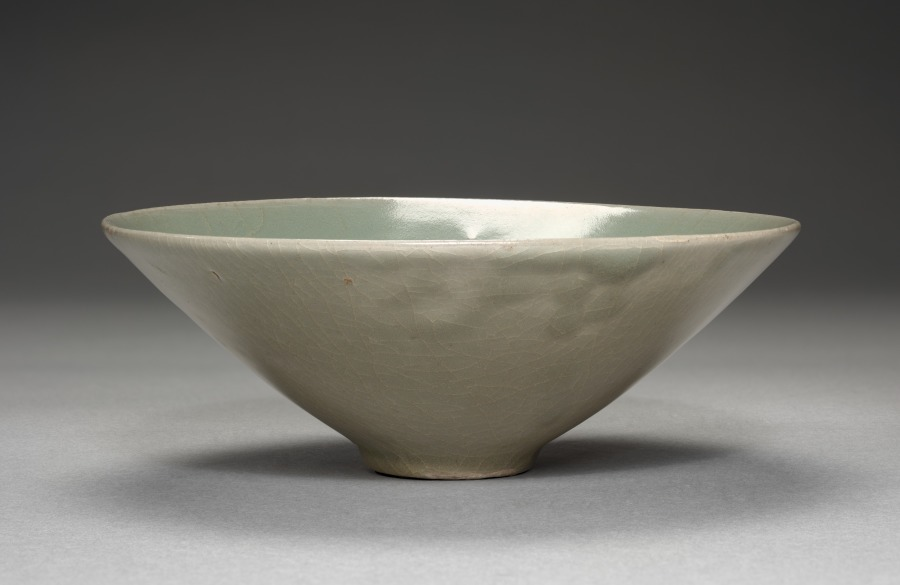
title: Bowl with Cloud Design in Relief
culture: Korea, Goryeo dynasty (918–1392)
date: 1100s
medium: glazed porcelain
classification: Ceramic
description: As early as the 600s, the practice of drinking tea and wine became an important part of elite leisure culture in Korea. A wide bowl like this example was especially suitable for drinking powdered tea shaved from a compressed tea cake, the most commonly enjoyed type during the Goryeo period. The pale bluish green glaze indicates that this tea bowl was created in the 12th century, the time when the production of celadon reached its technical peak.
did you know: Kangjin and Buan kilns in Jeolla province were the two major production centers for celadon wares during the Goryeo period (918–1392).